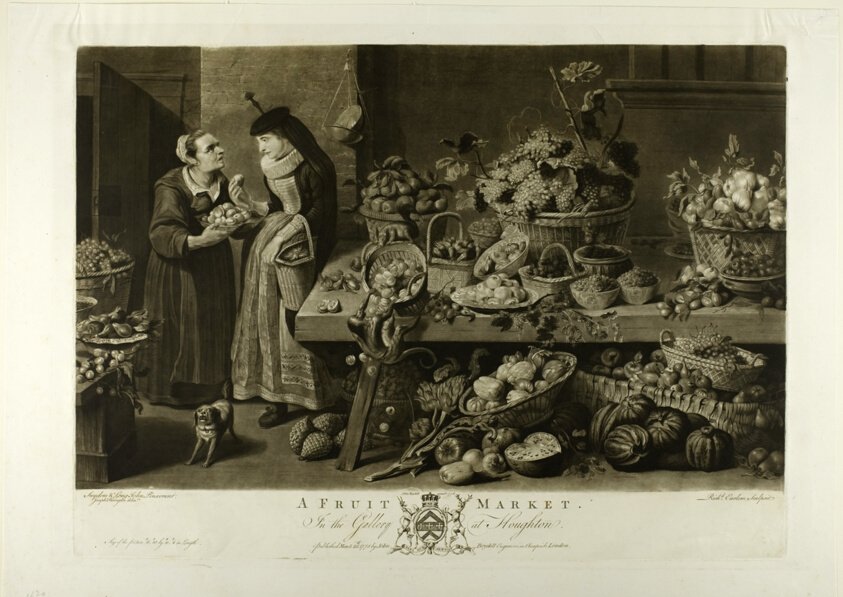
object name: Print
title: A Fruit Market, from The Houghton Gallery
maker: Richard Earlom (British, 1743–1822); after Frans Snyders (Flemish, 1579-1657); intermediary drawing by Joseph Farington (British, 1747-1821); published by John Boydell (British, 1719-1804)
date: 1775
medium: Mezzotint with engraving in black ink on ivory wove paper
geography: England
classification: mezzotint; print; prints and drawing